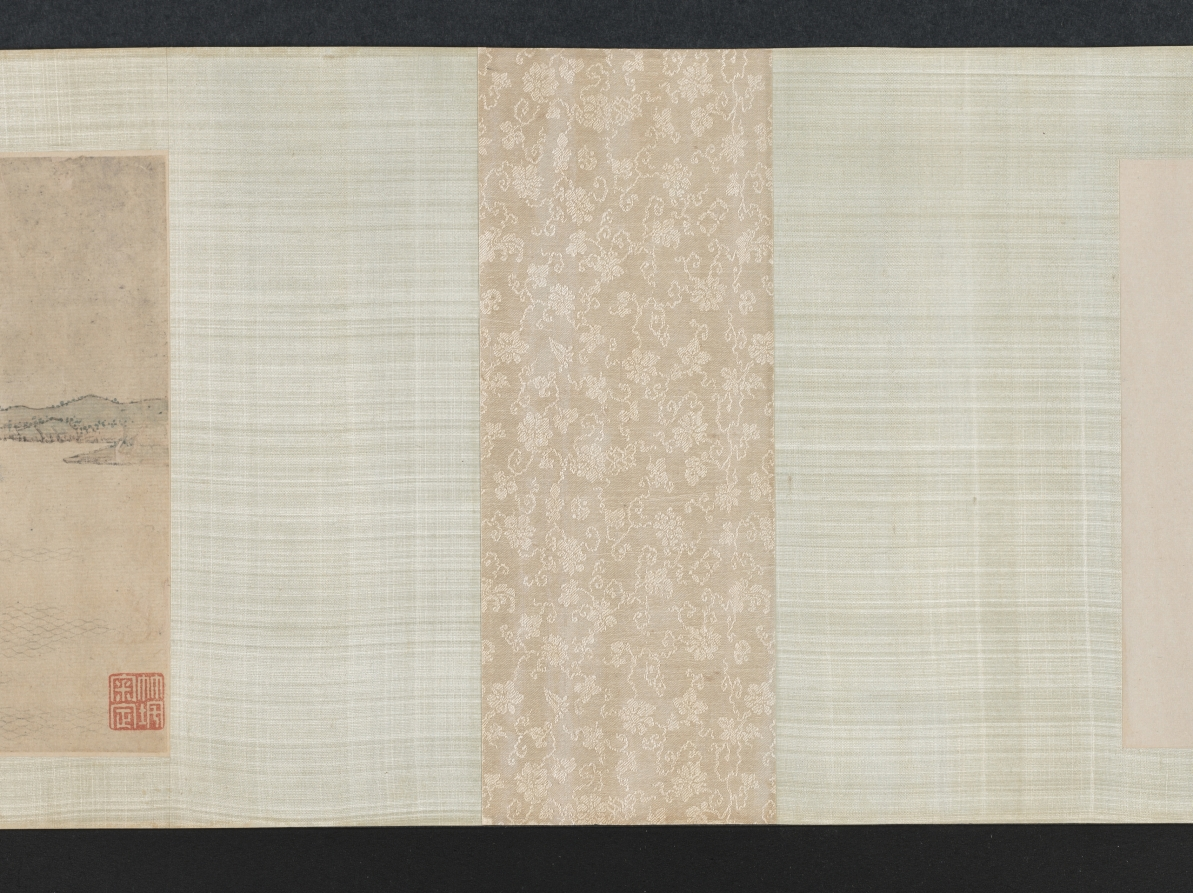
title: Saying Farewell at Xunyang (Song of the Pipa)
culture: China, Ming dynasty (1368–1644)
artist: Wen Boren (Chinese, 1502–1575)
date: 1500s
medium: handscroll, ink and color on paper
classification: Painting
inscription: "潯陽送客圖" 五峰山人文伯仁寫于停雲館中 [印] 文伯仁; 五峰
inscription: 2 colophons and 9 additional seals: 1 transcription of "Pipa xing 琵琶行” (Song of Pipa) and 3 seals of Zhu Yizun 朱彜尊 (1629-1709); 2 seals of Wu Rongguang 吳榮光 (1773-1843); 1 colophon, dated 1826, and 3 seals of Wu Xijia 吳錫嘉 (mid-1700s)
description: This handscroll depicts The Song of the Pipa, a poem by Bai Juyi 白居易 (772–846) written after the poet’s encounter with a pipa player on the Yangzi River. Expelled from her home city when her beauty and fame had faded, she played for the poet at night. Her musical performance and tragic life story resonated with Bai Juyi, who had just been demoted and exiled from life at court himself. The hazy, vast view and pale color tonalities of this painting illustrate these feelings of endless sadness, having lost one’s sense of purpose in life.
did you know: Wen Boren depicted the chilly autumn water with a fishnet pattern.